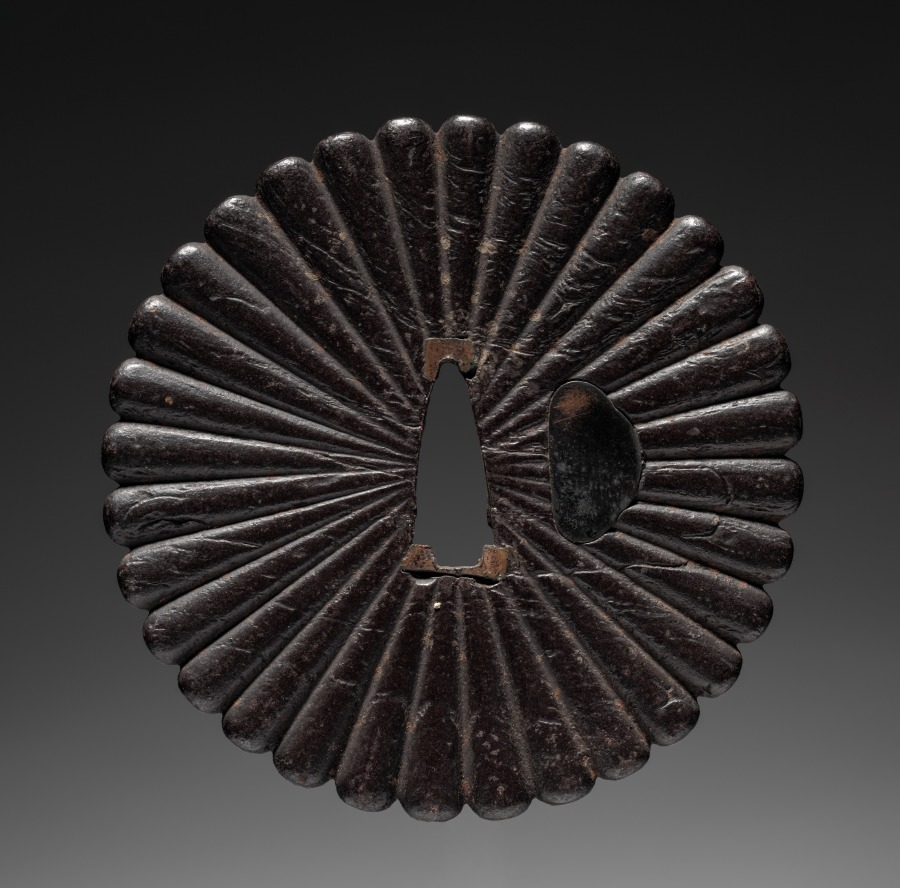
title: Sword Guard (Tsuba)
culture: Japan, possibly Edo period (1615–1868)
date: c. 1615–1868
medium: metal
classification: Arms and Armor